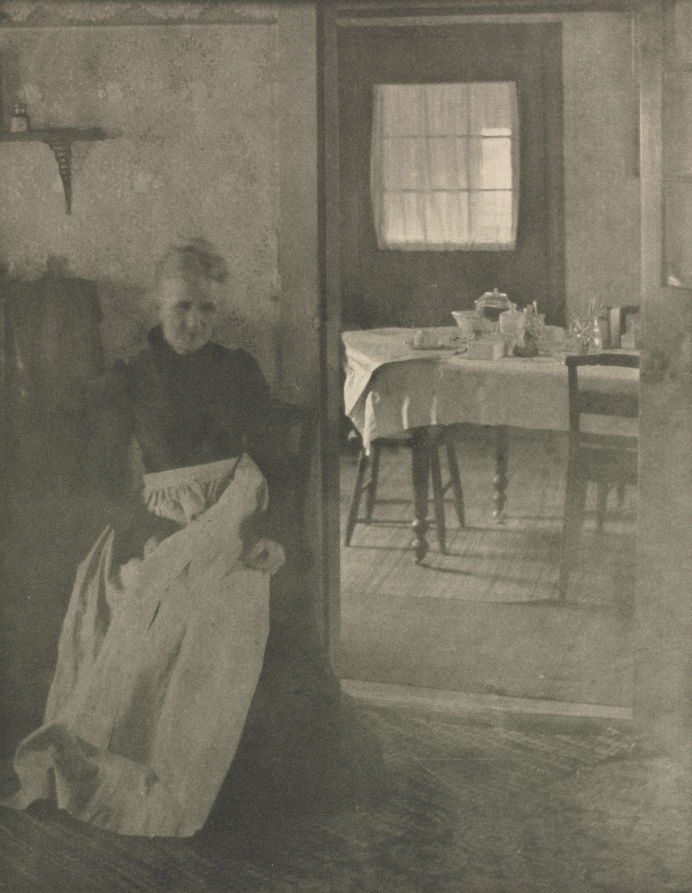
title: Camera Work: Illustration to "Eben Holden"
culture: America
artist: Clarence H. White (American, 1871–1925)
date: 1903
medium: photogravure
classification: Bound Volume